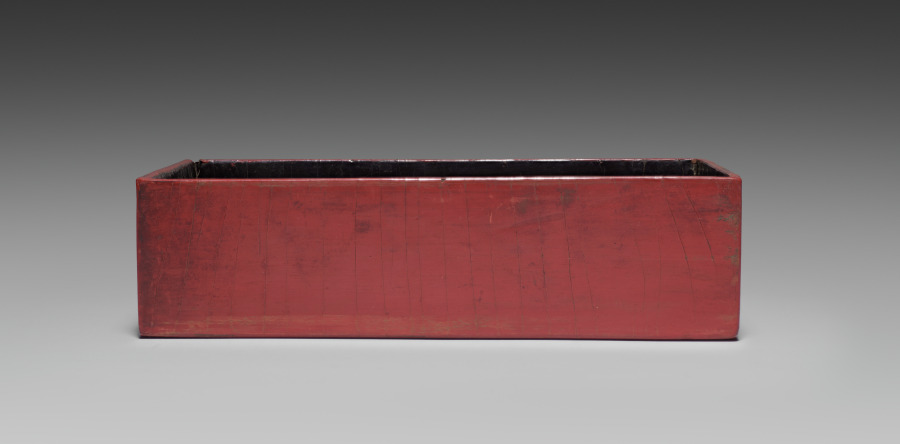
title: Drawer for a Tihong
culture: China, Ming dynasty (1368-1644), Wanli reign (1572-1620)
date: 1585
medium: carved cinnabar lacquer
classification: Lacquer